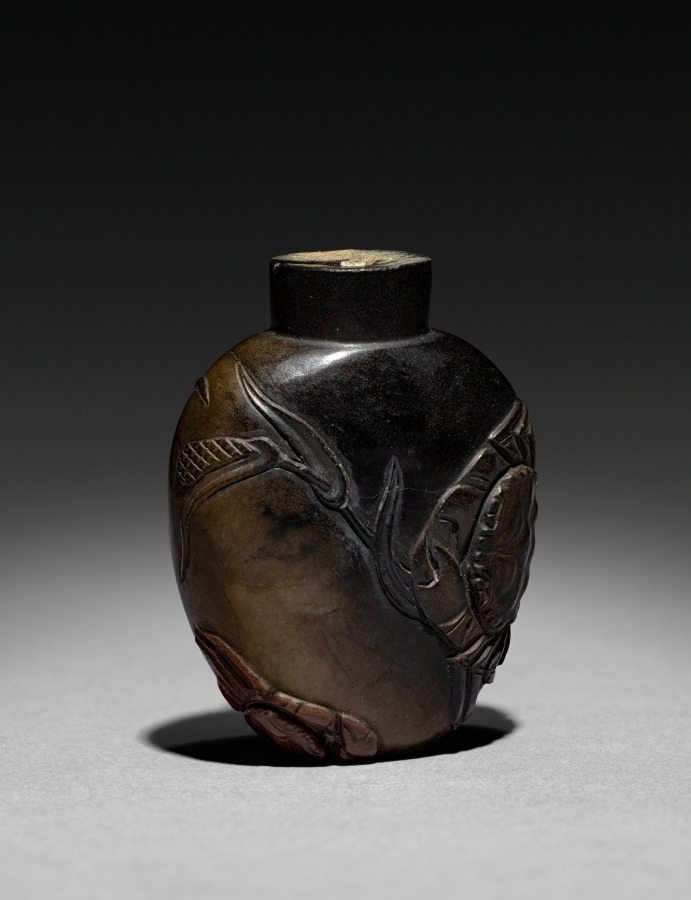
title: Snuff Bottle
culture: China, Qing dynasty (1644-1911)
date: 1800s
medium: glass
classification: Glass